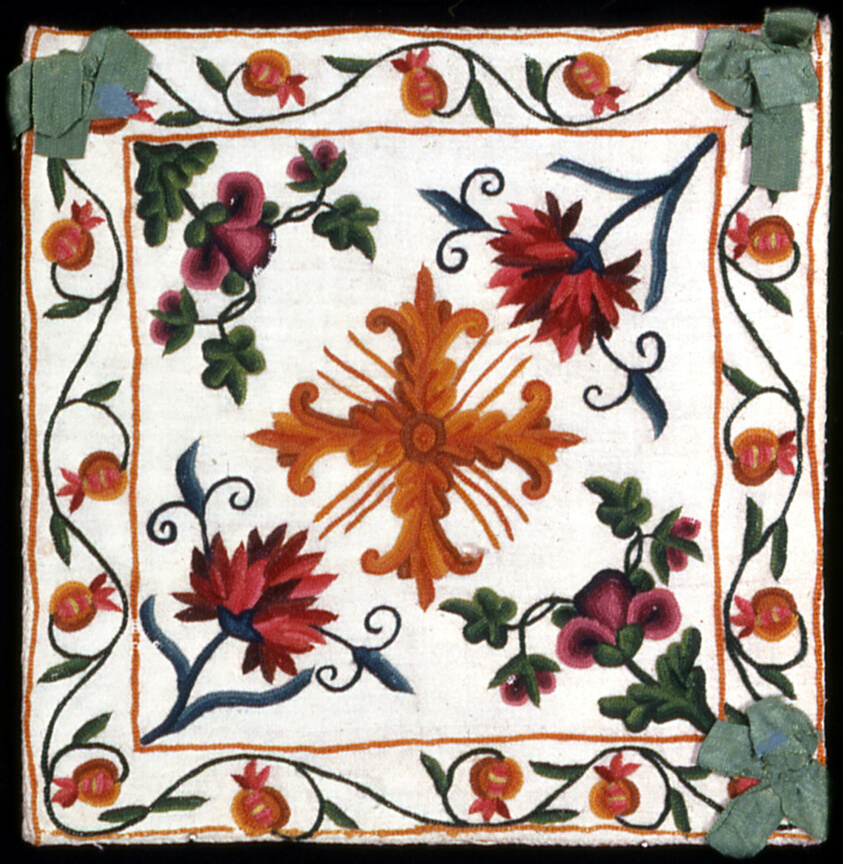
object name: Religious/Ritual Object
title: Chalice Cover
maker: France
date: c. 1750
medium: Wool, 2:2 twill weave; embroidered with wool, in chain stitches; with silk, plain weave ribbons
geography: France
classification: textile; needlework (visual works); liturgical; ritual objects